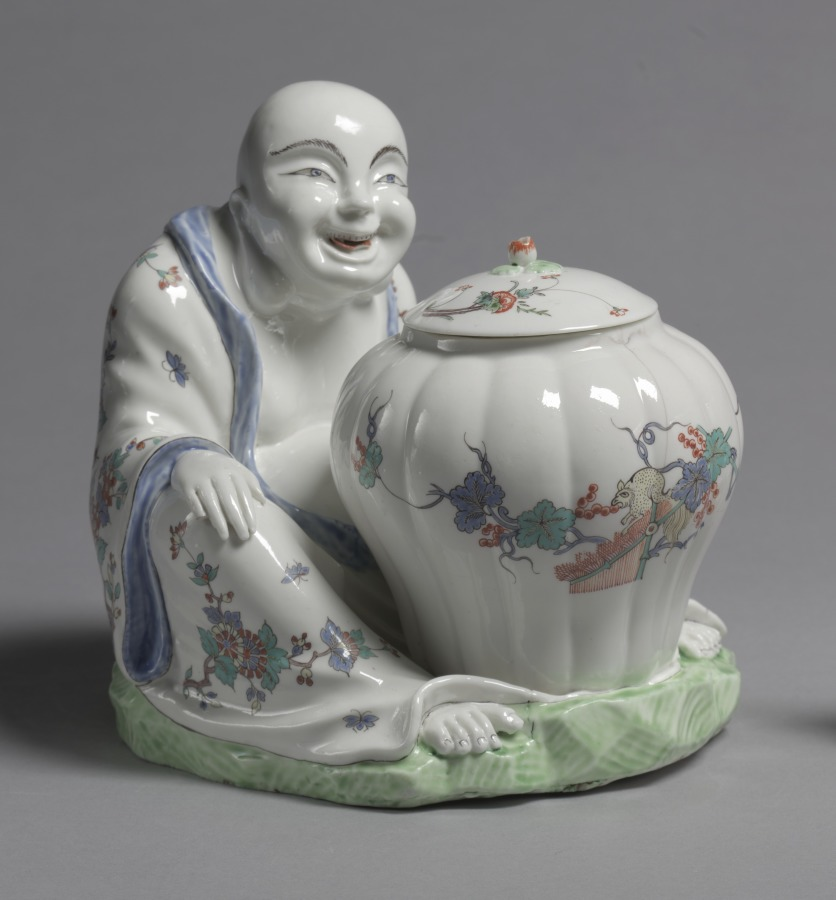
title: Figure of Budai or Hotei with Jar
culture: France, Chantilly, 18th century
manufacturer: Chantilly Porcelain Factory (French)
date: c. 1735–40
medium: Tin-glazed soft-paste porcelain with enamel decoration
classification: Ceramic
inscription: [Mark of the Chantilly factory (red hunting horn), on bottom]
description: The production of decorative figures like this one, referred to as magots or pagodes in European texts, was the result of an 18th-century European interest in Chinese and Japanese culture and porcelain. Budai, pronounced Hotei in Japanese, was a semilegendary Chinese monk known in Japan through the transmission of Chan Bhuddism. This figure’s decoration with multicolor overglaze enamels on a milky-white is typical of Japanese Kakiemon style.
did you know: In 1735, the Chantilly factory was given a 25-year royal privilege for the manufacture of objects that imitated Japanese porcelain.